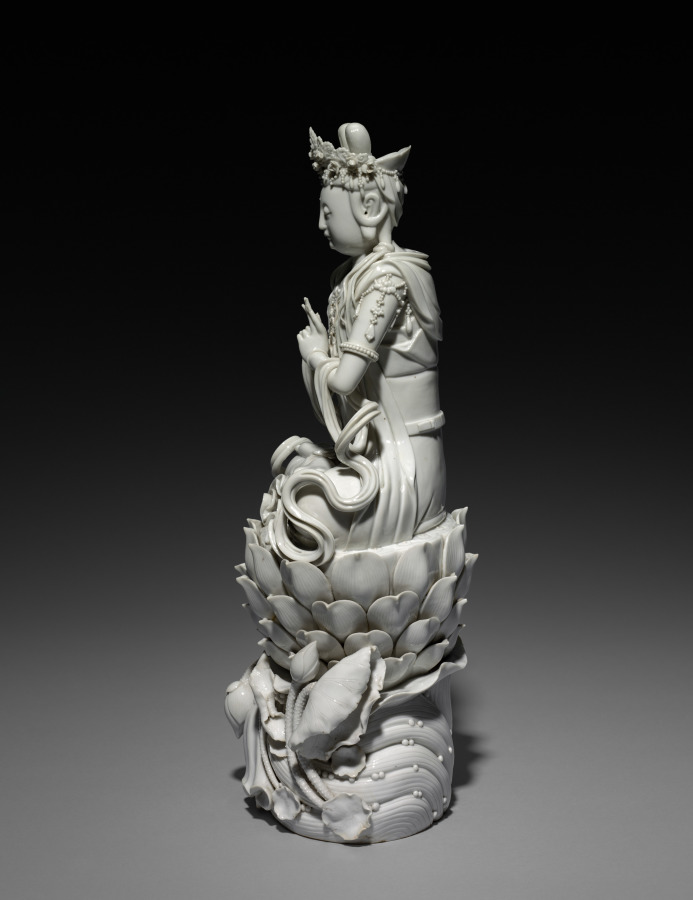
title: Bodhisattva Guanyin of the South Sea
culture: China, Fujian Province, Ming dynasty (1368-1644) - Qing dynasty (1644-1911)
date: 1600s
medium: Porcelain with white glaze, Dehua ware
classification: Ceramic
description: Guanyin, the Buddhist bodhisattva of infinite compassion (Avalokiteshvara in Sanskrit), is the most revered enlightened being in East Asia. The bodhisattva perceives all beings in need of help and reveals himself in many forms. Here, his elaborate lotus pedestal rests on the crest of surging waves, identifying him as Guanyin of the South Seas. The Dehua kilns in Fujian province in southern China produced white porcelain figures for both the domestic and export markets. In China, such a figure may have furnished a house altar or a temple.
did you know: When Marco Polo visited China in the late 1200s, he was so impressed by the Dehua kilns that he included lengthy descriptions of ceramic production in his chronicle of his journey.